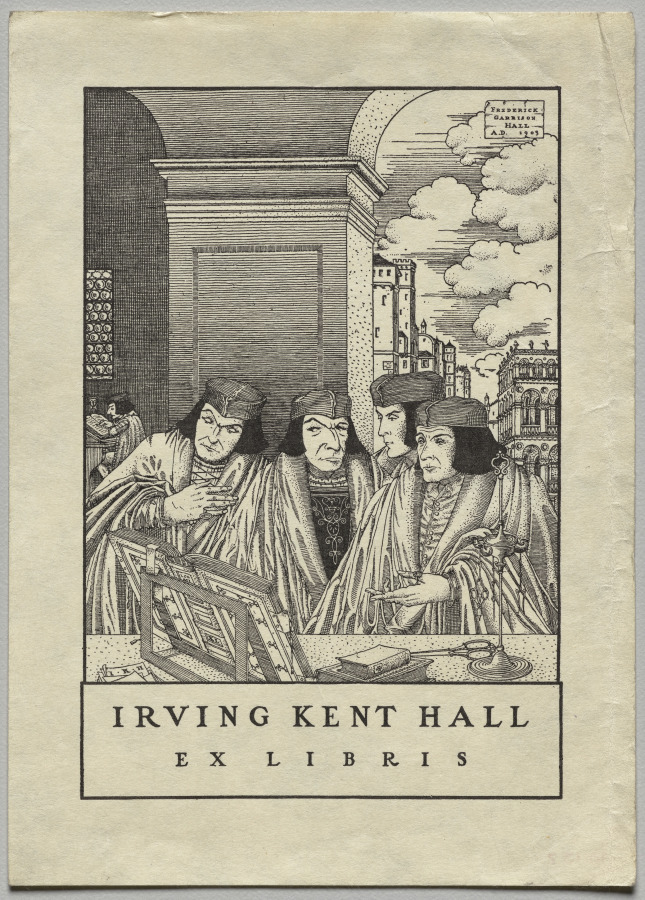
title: Bookplate: Irving Kent Hall, Ex Libris inscribed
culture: America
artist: Frederick Garrison Hall (American, 1879–1946)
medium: engraving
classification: Print